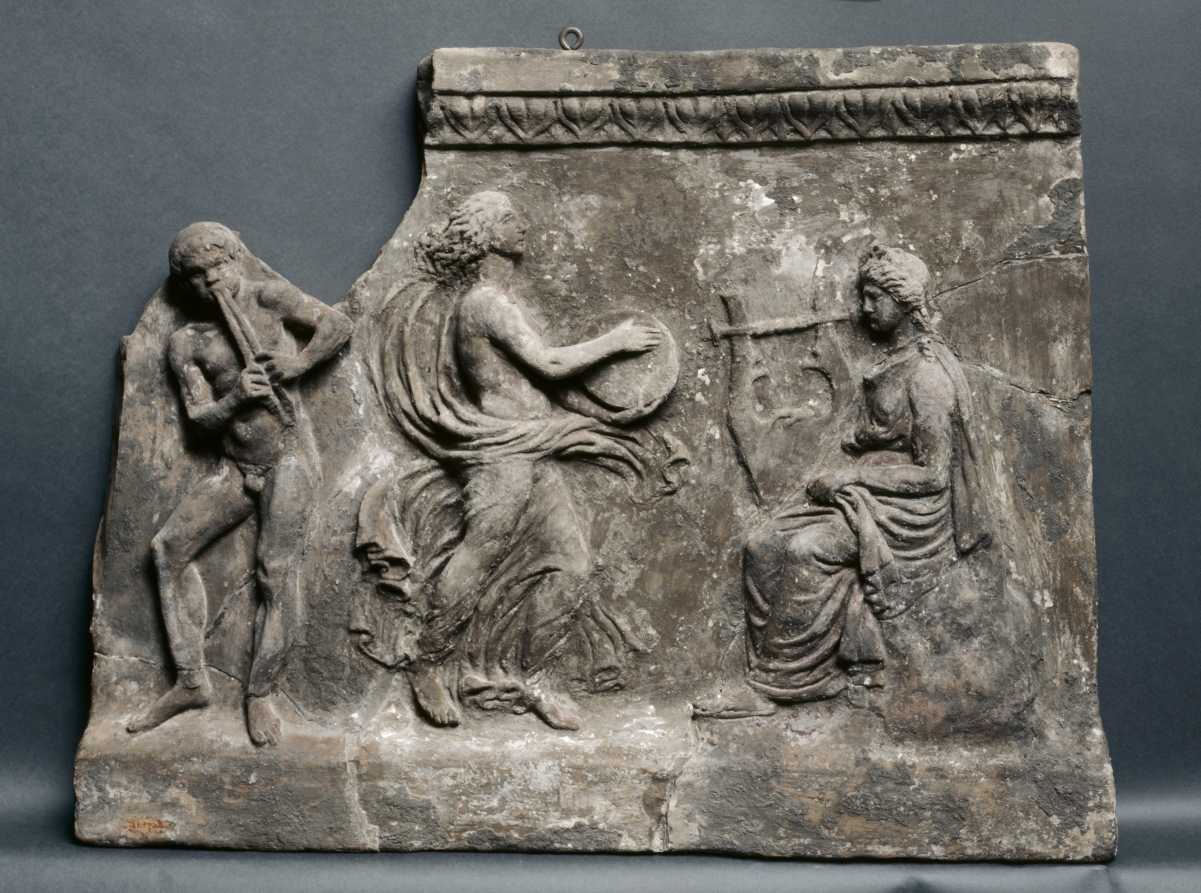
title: Wall Tile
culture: Italy, Roman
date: 1–25 CE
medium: terracotta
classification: Sculpture